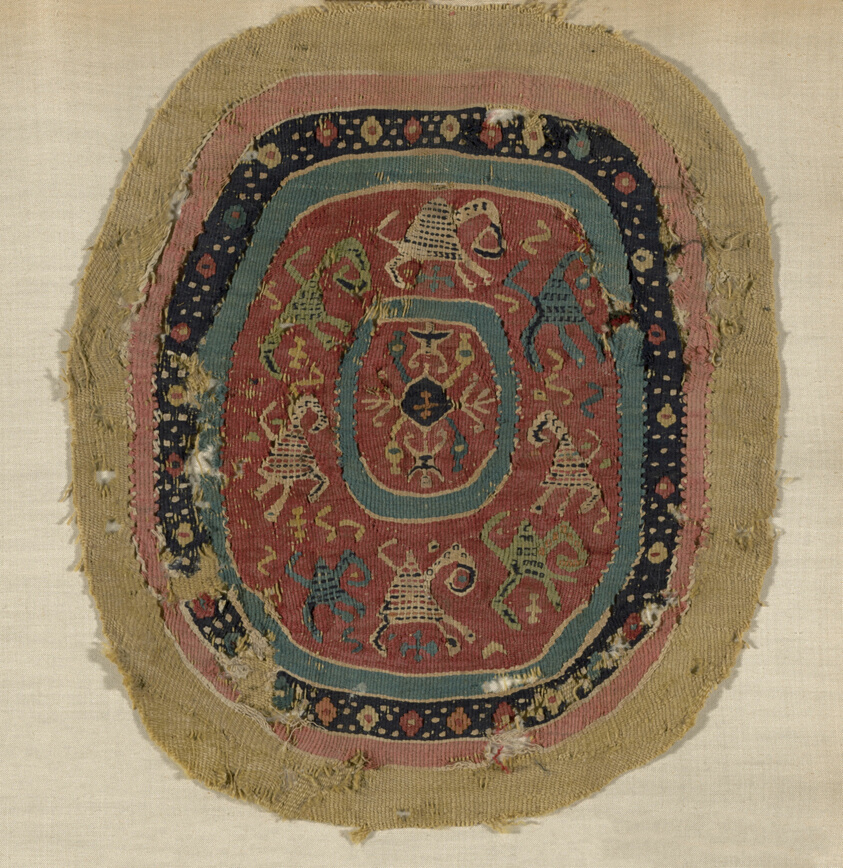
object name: Textile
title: Panel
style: roman period (egyptian), coptic (period)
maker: Coptic (Egypt)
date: Roman period (30 B.C.– 641 A.D.), 3th/5th century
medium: Linen and wool, tapestry weave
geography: Egypt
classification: textile; weaving